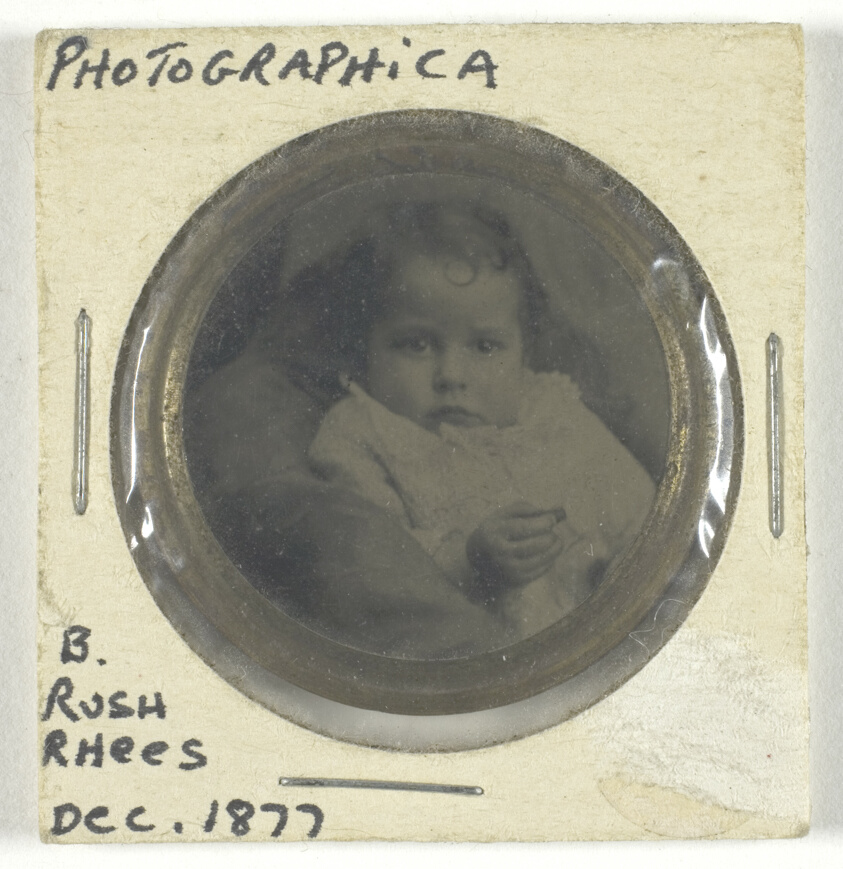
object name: Photograph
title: Untitled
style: 19th century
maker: Artist unknown; 19th century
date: December 1877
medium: Gelatin silver print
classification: photography; photograph